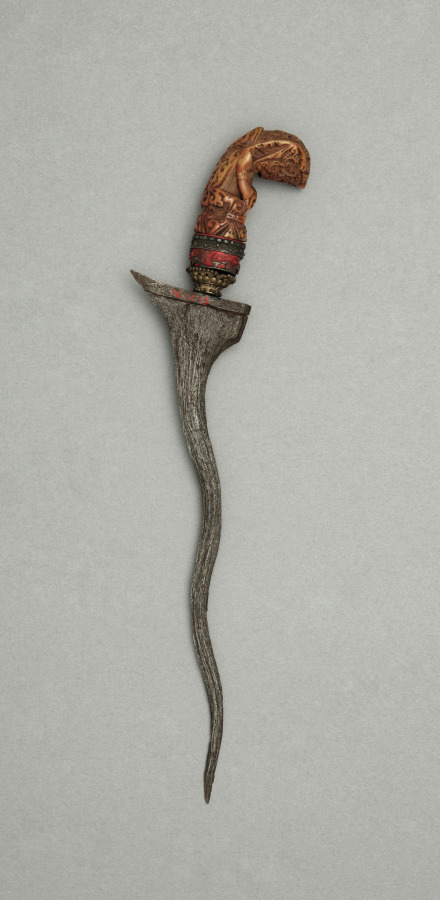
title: Dagger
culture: Philippines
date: before 1916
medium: Blade: metal; handle: ivory with silver mounting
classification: Arms and Armor